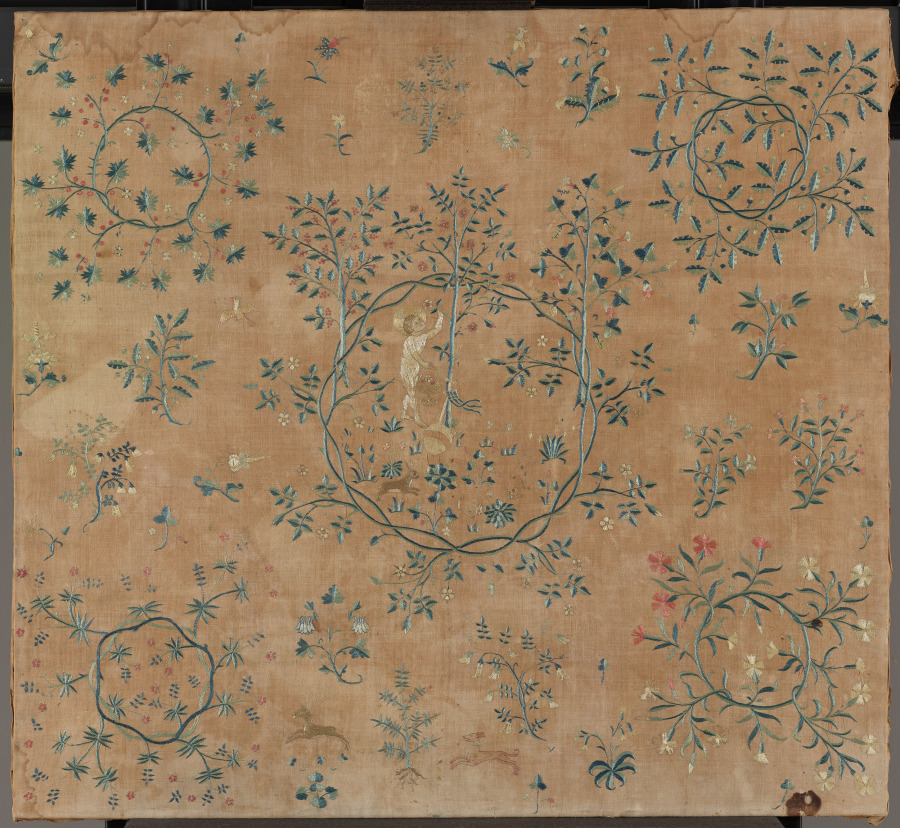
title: Christ Gathering Roses, Centerpiece of an Altar Cloth(?)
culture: Germany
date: early to mid-1400s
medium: Linen: plain weave; silk: embroidery (split stitch)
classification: Embroidery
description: The altar cloth was probably made for a southern German convent in the 15th century. While the focus on the Christ child is typical for female spirituality in the late Middle Ages, there are no comparative examples for the Christ child picking flowers. The detailed depiction of plants and flowers is of unusual quality for the embroideries of this period.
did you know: The Christ child has put aside his globe to devote himself entirely to picking flowers.